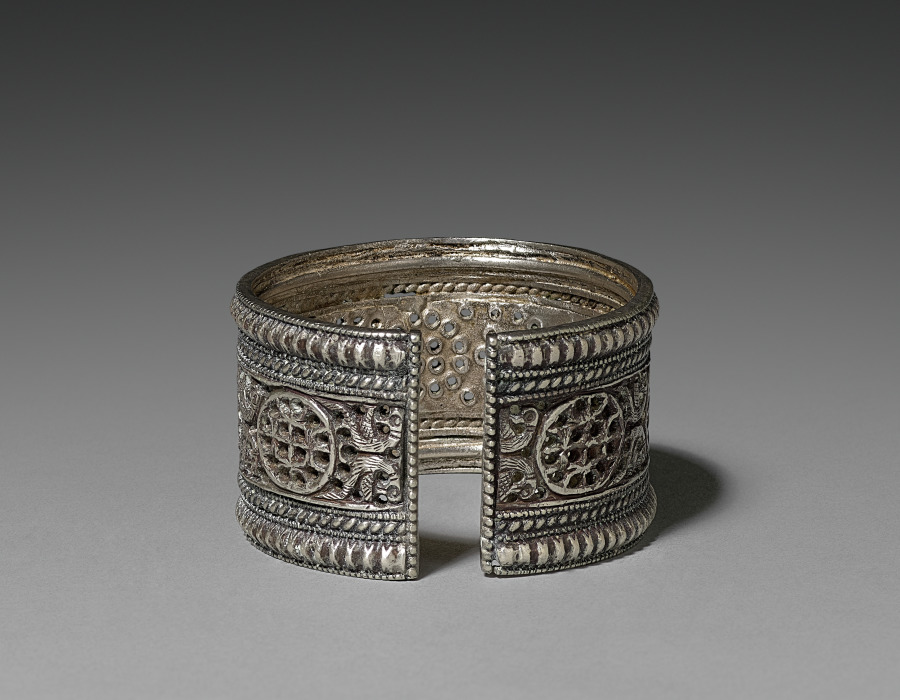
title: Bracelet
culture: India, Lahore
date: 1800s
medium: silver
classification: Jewelry